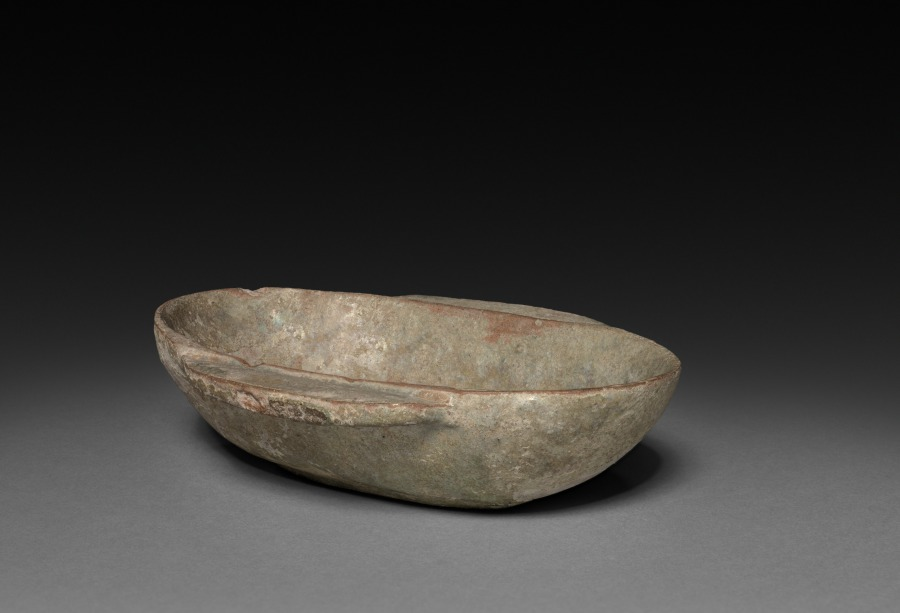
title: Ear Cup (Erbei) for Wine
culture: China, Han dynasty (202 BCE–220 CE)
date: 206 BCE–220 CE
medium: lead glazed earthenware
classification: Ceramic